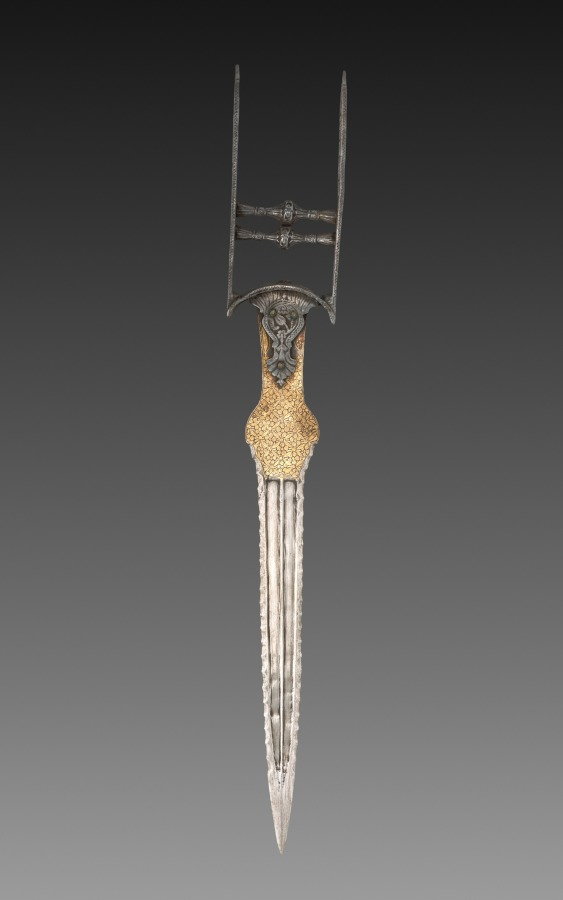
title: Dagger (Katar)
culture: India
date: 1800s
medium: steel with gold damascening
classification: Arms and Armor